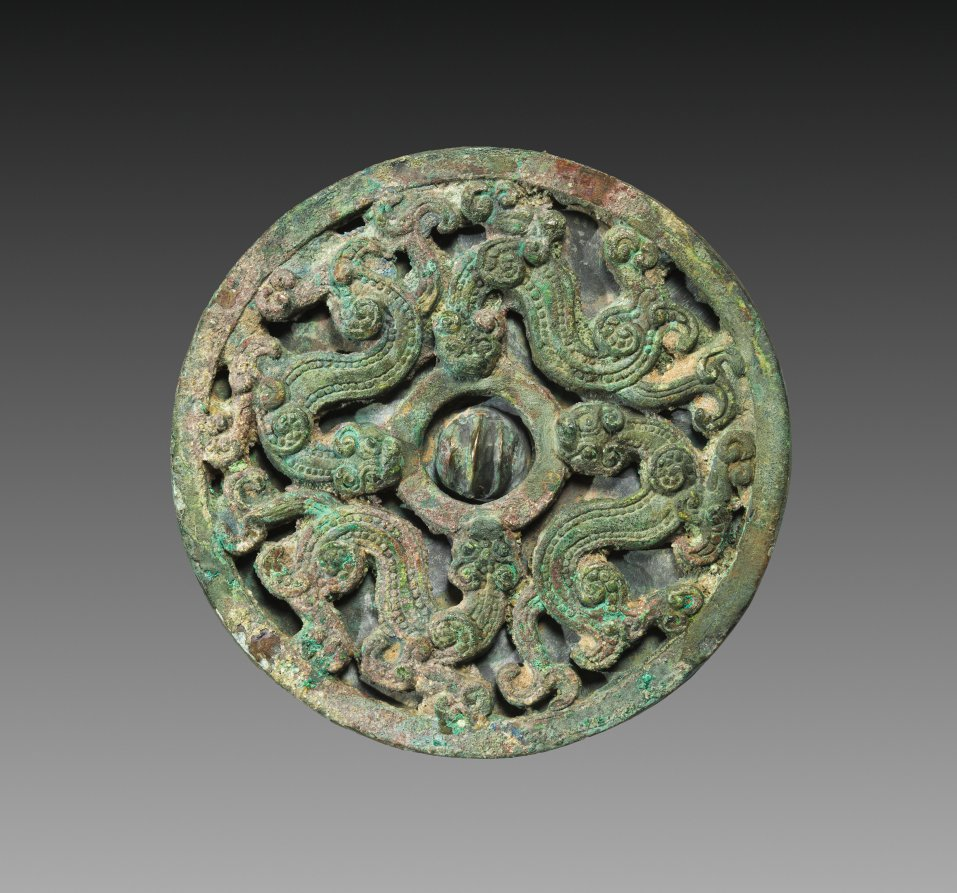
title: Double-tier Mirror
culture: China, Warring States period (475–221 BCE)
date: 300s BCE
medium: bronze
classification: Metalwork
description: The craft of mirror making prospered remarkably during the Warring States period, as bronzes increasingly served as luxury items for individuals. A variety of ornamentations appear on the backs of mirrors, some of which bear resemblance to those found in contemporary jades, lacquer wares, and textiles—all luxury items of the day. This tiny round mirror belongs to the rare double-cast type. It consists of two different layers: a reflective disc with a central knob at the back, and a ring with openwork designs of undulating serpents.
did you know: This luxury object consists of two different layers: a reflective disc with a central knob on the back, and a ring with openwork serpent designs.